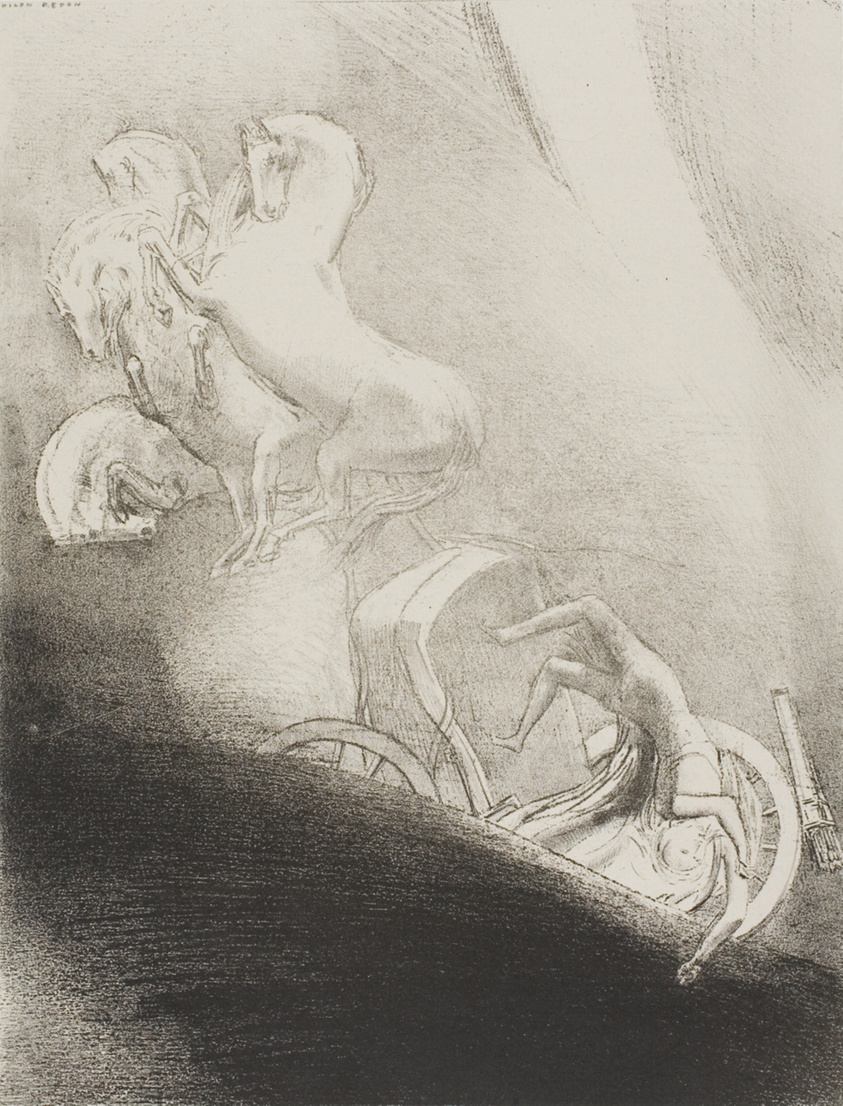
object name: Print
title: He Falls Head Foremost Into the Abyss, plate 17 of 24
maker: Odilon Redon (French, 1840-1916)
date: 1896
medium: Lithograph in black on light gray China paper laid down on ivory wove paper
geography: France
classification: lithograph; print; prints and drawing; paper